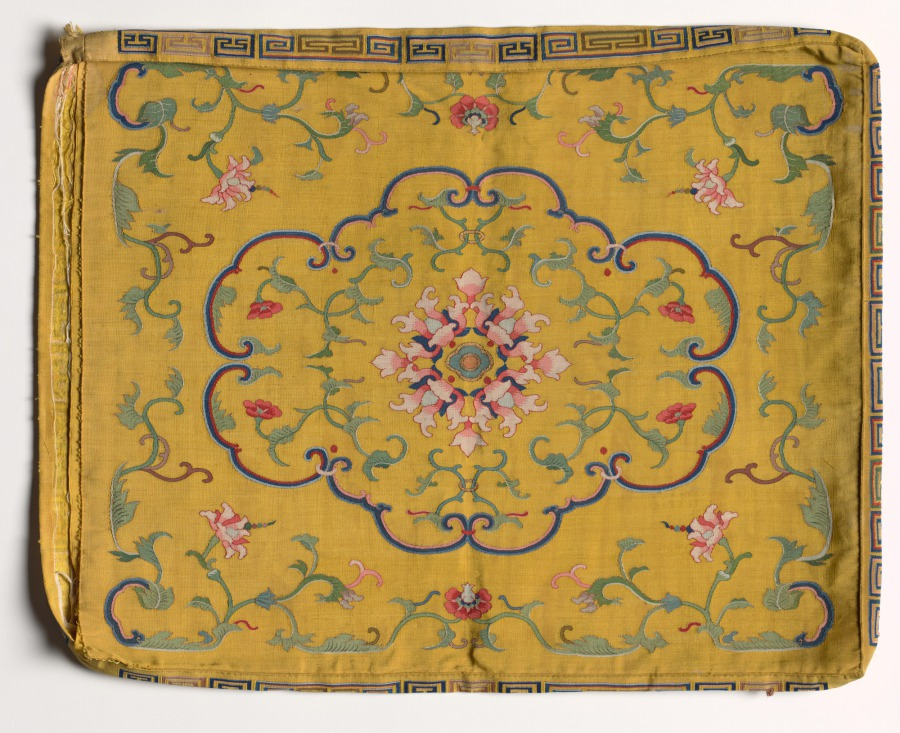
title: Cushion Cover (one of a set of four)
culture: China, Qing dynasty (1644-1911)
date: 1700s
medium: silk, metallic thread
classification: Textile